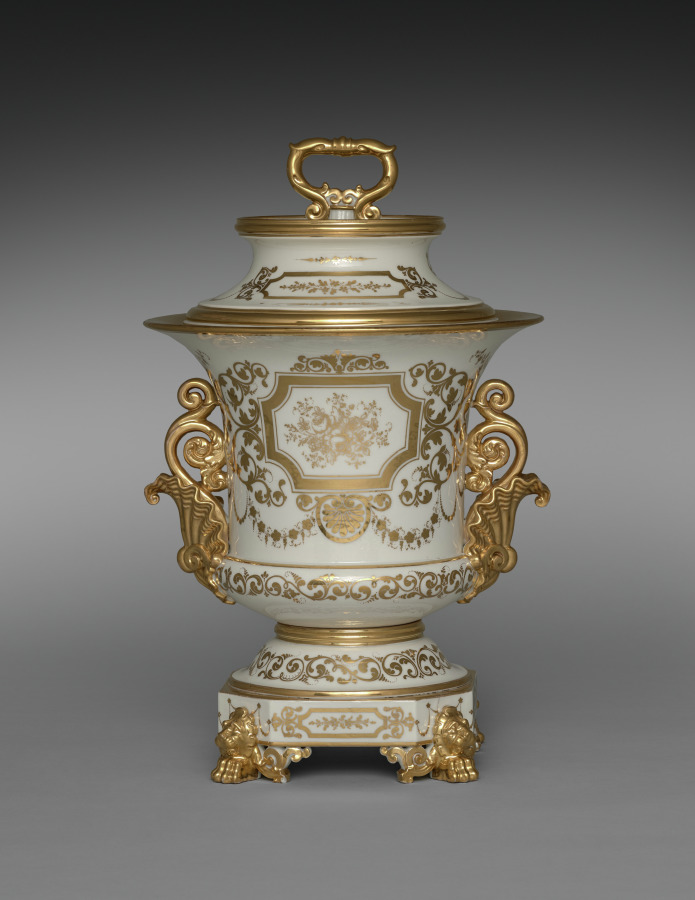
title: Covered Ice Cream Pail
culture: France, Paris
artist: Factory of Jacob-Petit (French, 1830–1865)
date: c. 1840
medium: gilt porcelain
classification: Ceramic